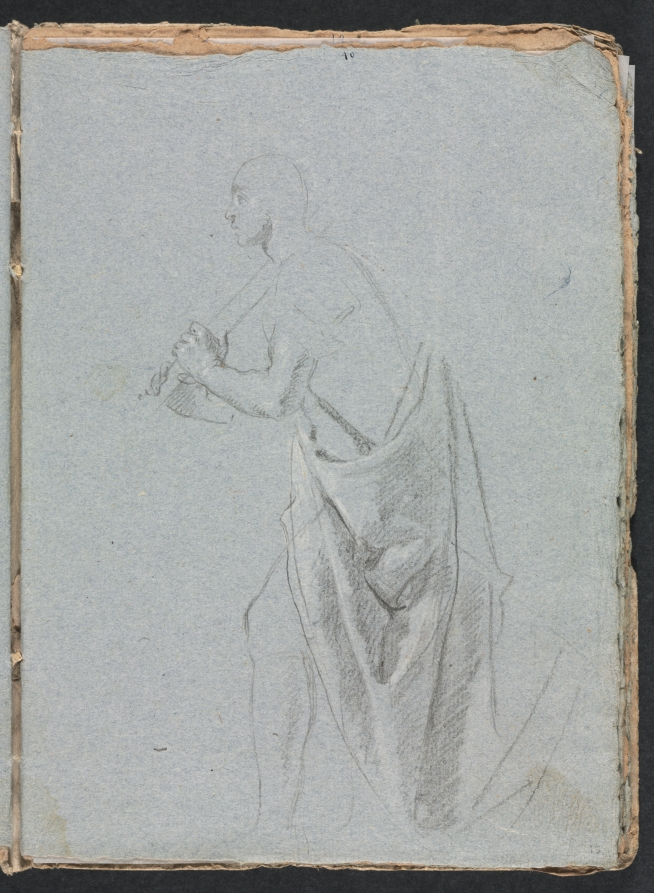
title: Verona Sketchbook: Standing male with drapery (page 19)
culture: Italy, 18th century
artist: Francesco Lorenzi (Italian, 1723–1787)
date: 1760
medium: black chalk with white heightening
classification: Bound Volume